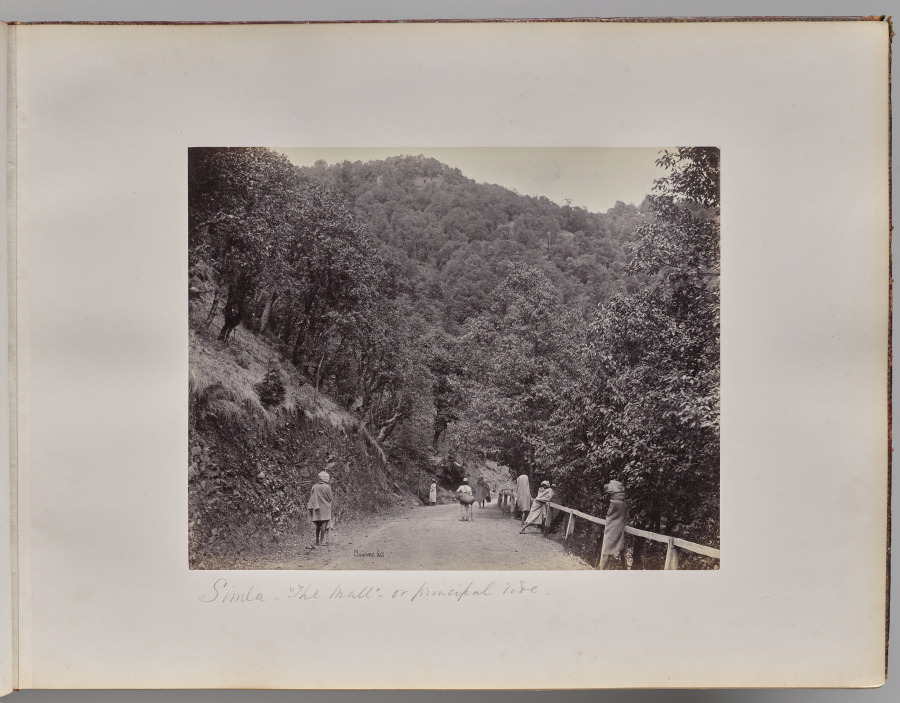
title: Shimla. The Mall or Principal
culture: England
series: Photographs of Northern India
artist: Samuel Bourne (British, 1834–1912)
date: 1863–70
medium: albumen print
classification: Photograph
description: The 50 images in this album, all taken in the 1860s, move from the hill towns of the Himalayas down to cities including Lahore (now in Pakistan), Delhi, Lucknow, Agra, Benares (now Varansi), and Calcutta (now Kolkata). Architectural studies of major monuments offer valuable historical records of what sites such as the Taj Mahal and the imperial mosque of the Mughal emperors in Delhi looked like before 20th-century restorations.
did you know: Samuel Bourne, the author of most the images in this album, was a banker in England before he moved to India to become a professional photographer.